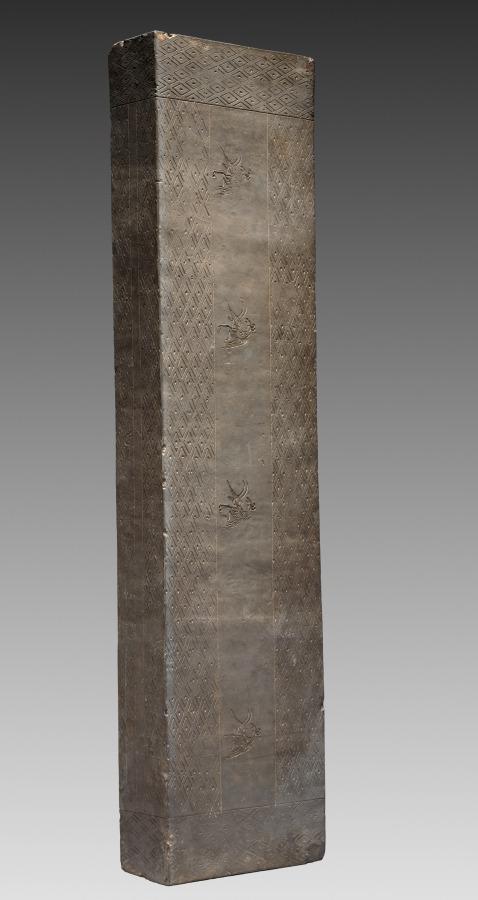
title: Tomb Tile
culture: China, Henan province, Jincun, Eastern Zhou dynasty (770–256 BCE)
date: 771–256 BCE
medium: earthenware with stamped decoration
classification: Ceramic